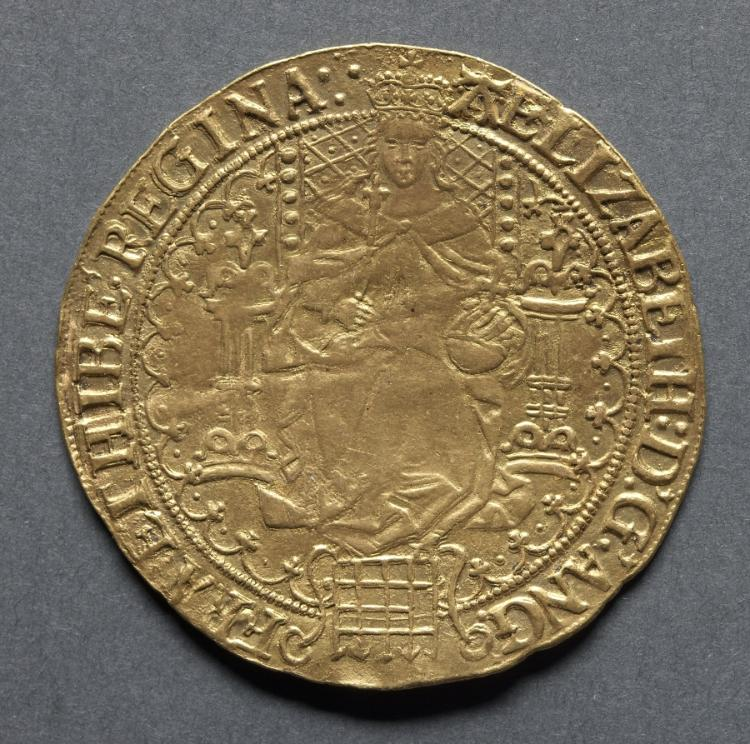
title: Sovereign of Thirty Shillings (obverse)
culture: England, Elizabeth I, 1558-1603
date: 1583–1603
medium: gold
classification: Coins